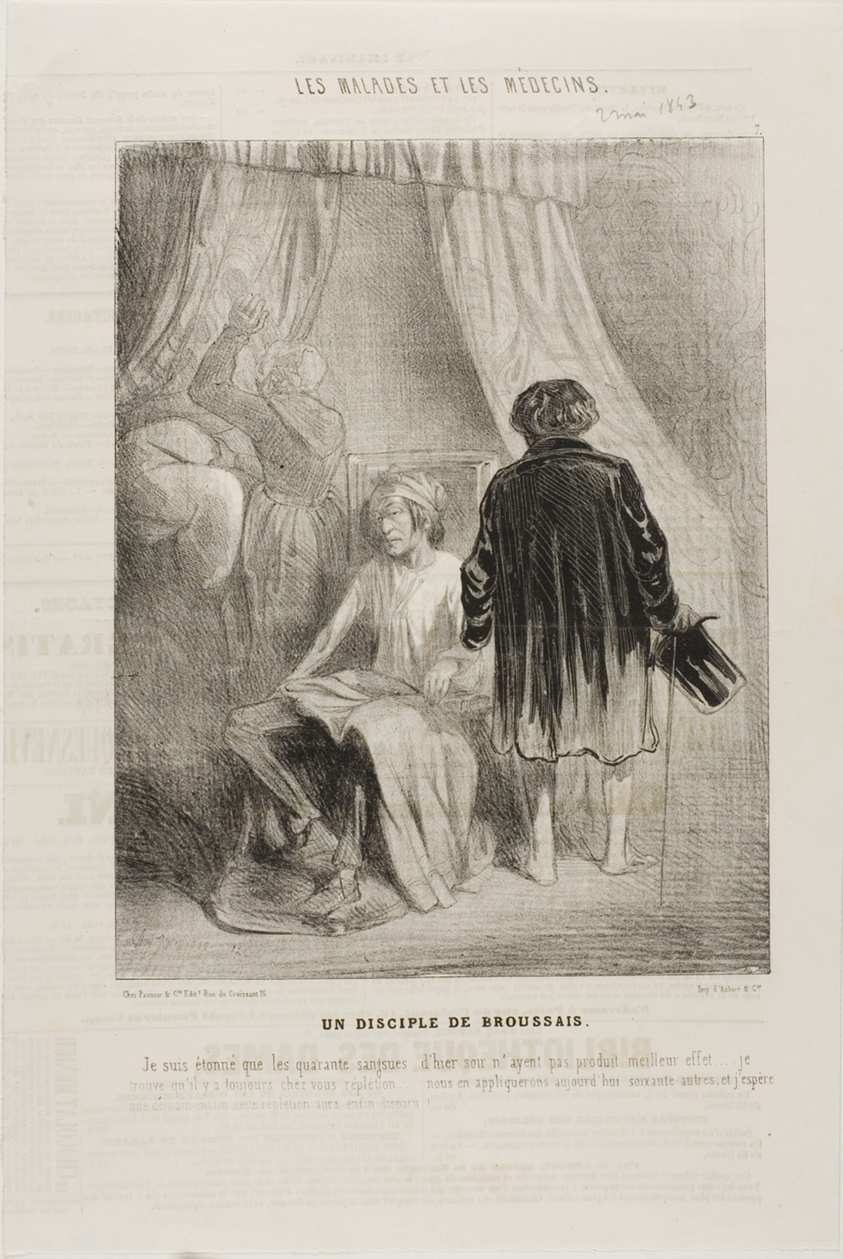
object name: Print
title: A Follower of Broussais (plate 7)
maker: Charles Émile Jacque (French, 1813-1894)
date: 1843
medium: Lithograph in black on ivory wove paper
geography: France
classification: lithograph; print; prints and drawing